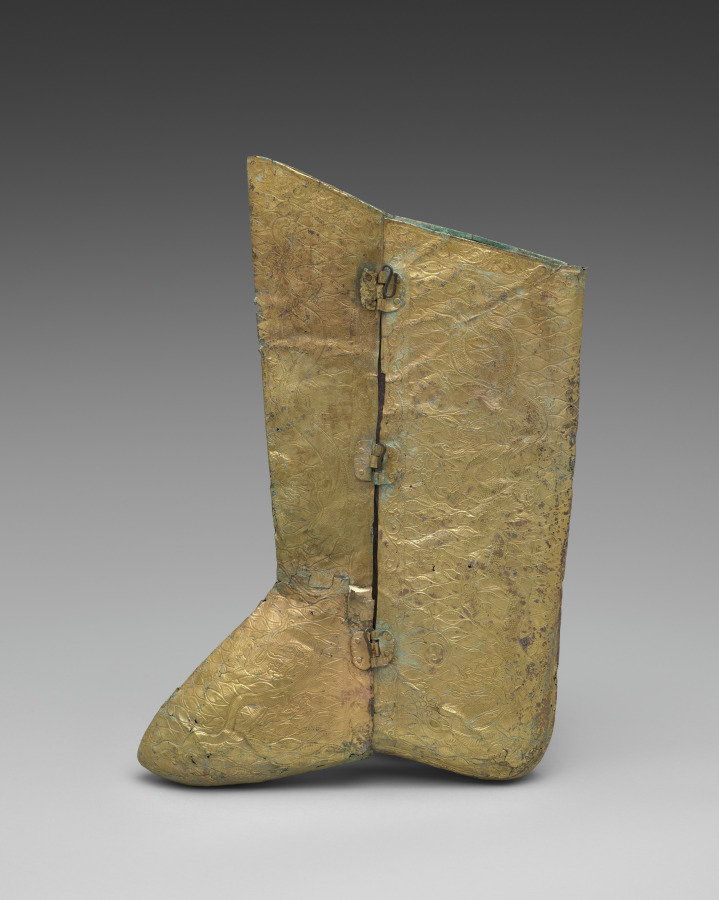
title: Gilt-bronze Boot, One of a Pair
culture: Northern China, Liao dynasty (907-1125)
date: 907–1125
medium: Gilt-bronze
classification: Metalwork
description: Bronze and silver-gilt boots, modeled after textile and leather boots, were found in Liao tombs. A pair of silver-gilt boots (dated 1018 or earlier) with phoenix motifs and cloud scrolls, were excavated from the tomb of Princess Chen and Xiao Shaoju in Inner Mongolia at Qinglongshan town in Naiman Banner; the couple’s faces were covered with gold masks. This gilt-bronze boot shows rising dragons chasing pearls and may have been made for a male tomb occupant.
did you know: The boot's dragon motif suggests that the wearer was a male princely member of the ruling family.